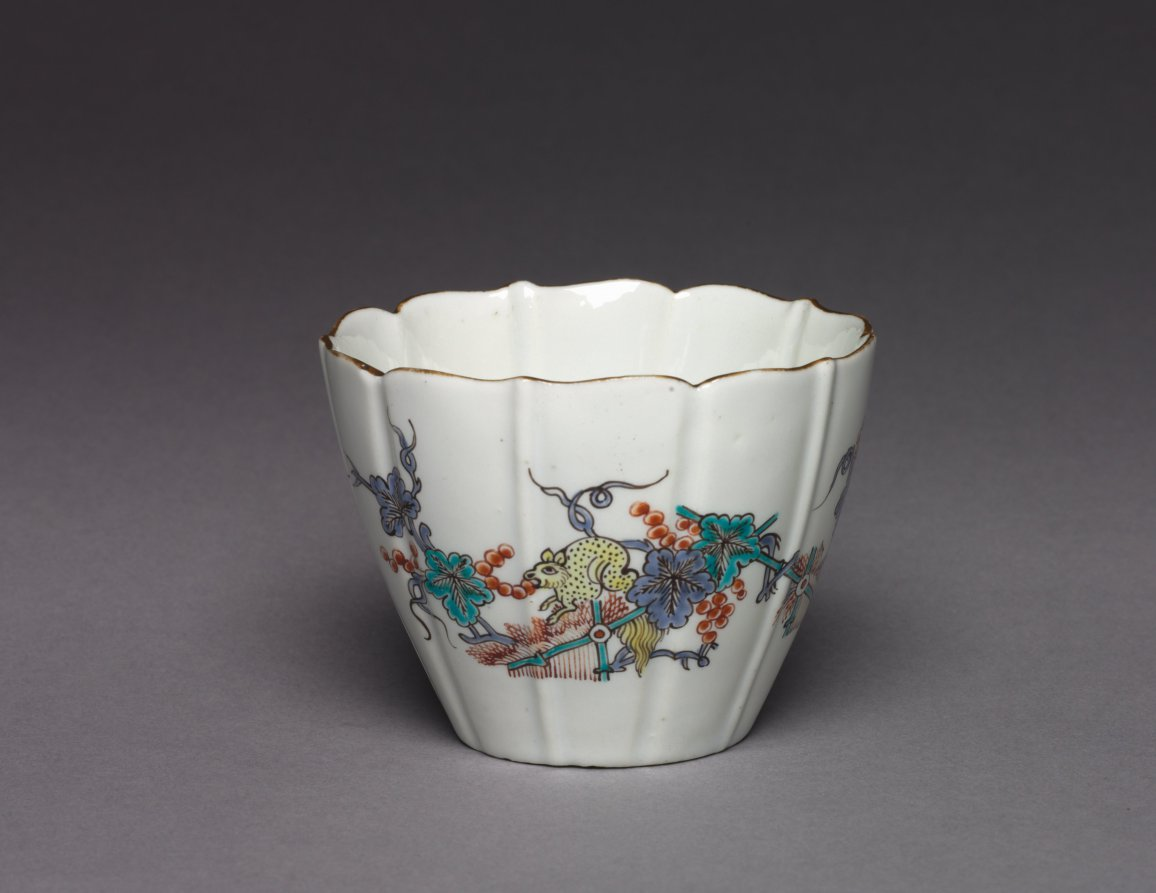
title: Tea Cup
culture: France, Chantilly, 18th century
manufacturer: Chantilly Porcelain Factory (French)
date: c. 1730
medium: soft-paste porcelain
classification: Ceramic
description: The pieces composing this individual tea set are entirely typical of Chantilly soft-paste porcelain in the Kakiemon style. Both the form and decoration of these pieces were inspired by Japanese prototypes. The use of knobs in the form of trumpet-shaped blossoms is characteristic of Chantilly wares.